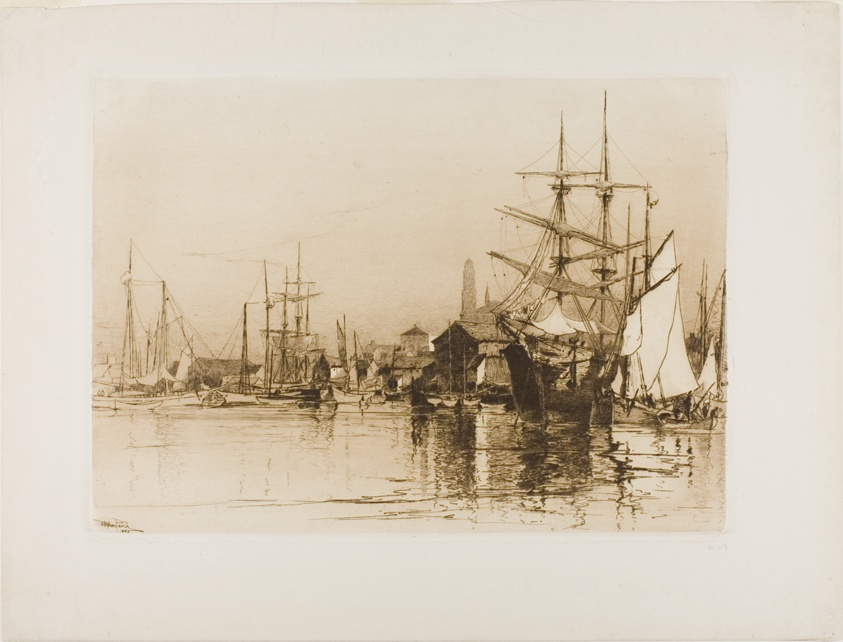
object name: Print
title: The Inner Harbor, Gloucester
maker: Stephen Parrish (American, 1846-1938)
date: 1883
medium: Etching and aquatint on ivory wove paper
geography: United States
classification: etching; print; prints and drawing